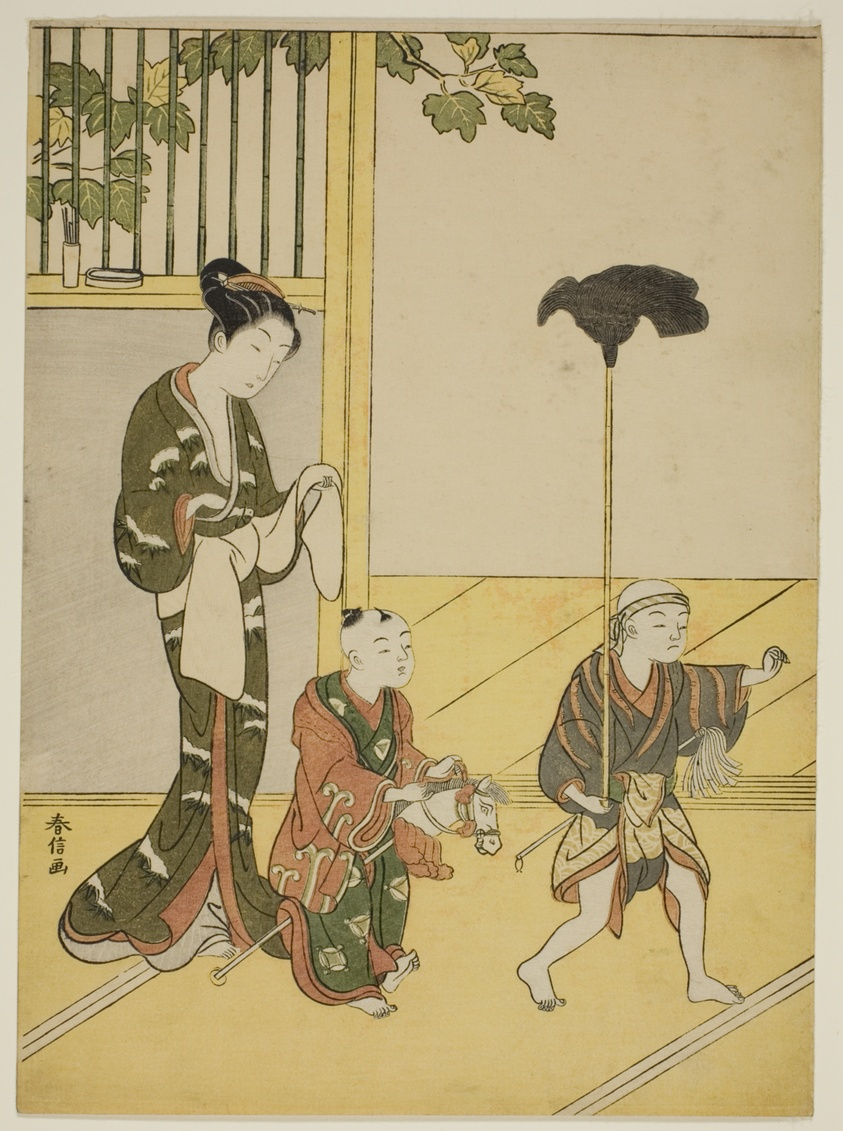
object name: Print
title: Playing Daimyo's Procession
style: Japanese (culture or style)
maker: Suzuki Harunobu 鈴木 春信; Japanese, 1725 (?)-1770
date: c. 1768/69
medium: Color woodblock print; chuban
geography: Japan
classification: woodblock print; print; asian art